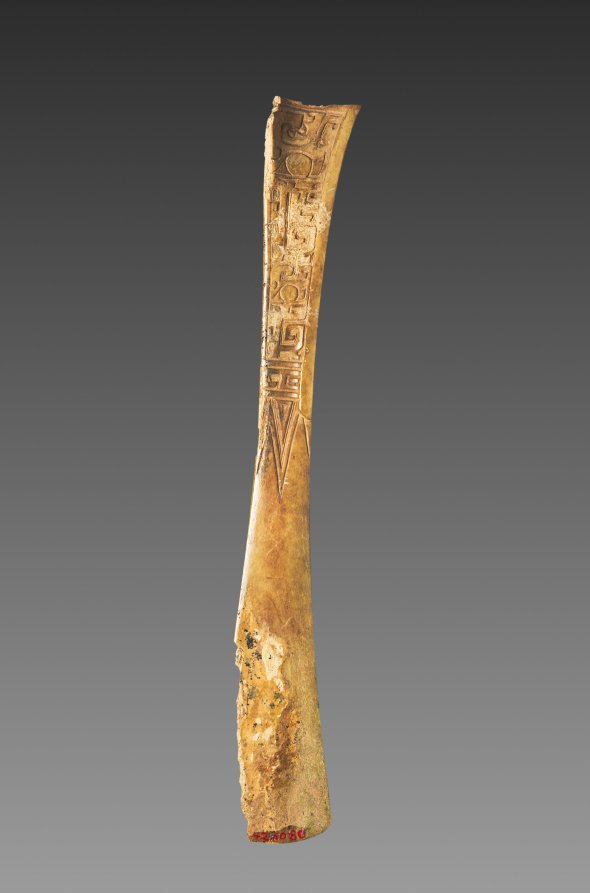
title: Spatula (Si)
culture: China, probably Anyang, Henan province, Shang dynasty (c. 1600–c. 1046 BCE)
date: 1300–1100 BCE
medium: bone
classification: Miscellaneous